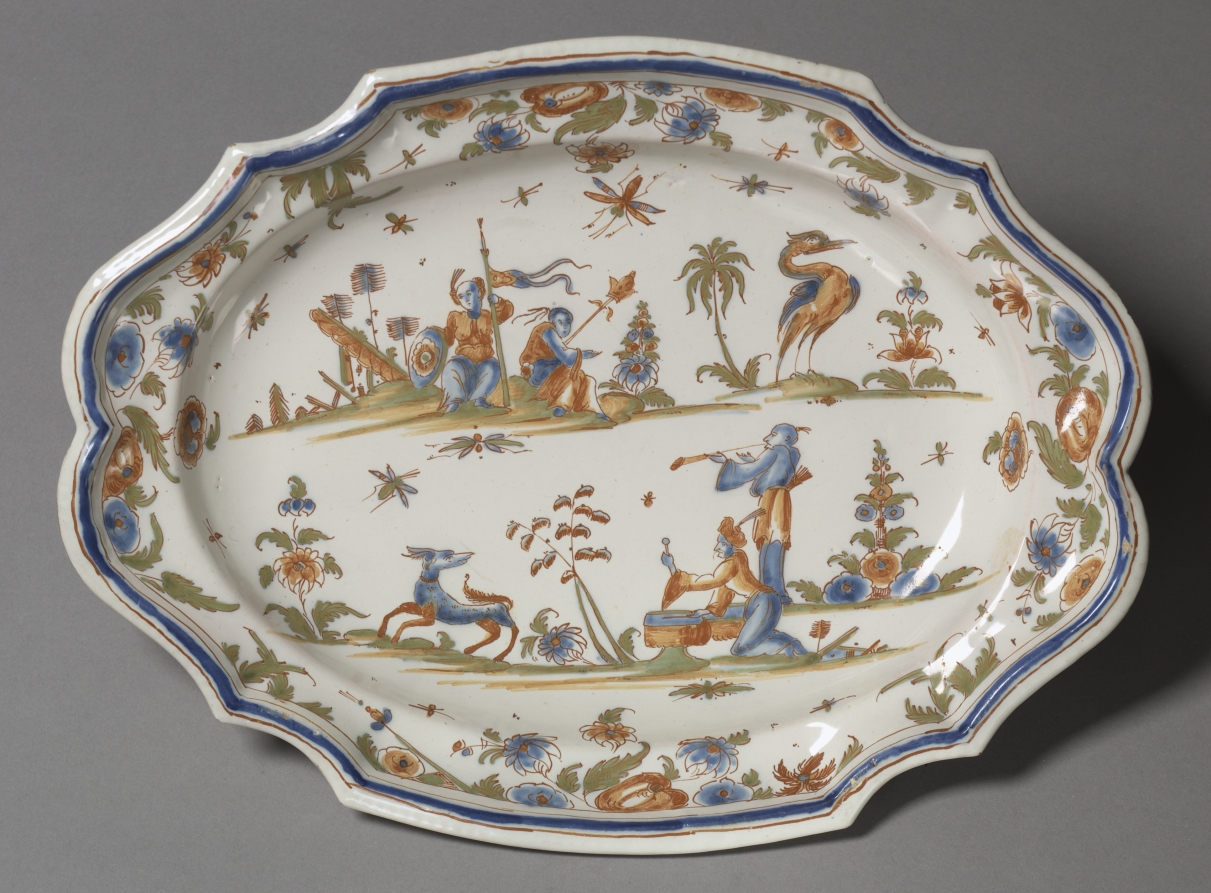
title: Platter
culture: France, Lyon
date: c. 1740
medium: Tin-glazed eathenware (faience) with enamel decoration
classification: Ceramic